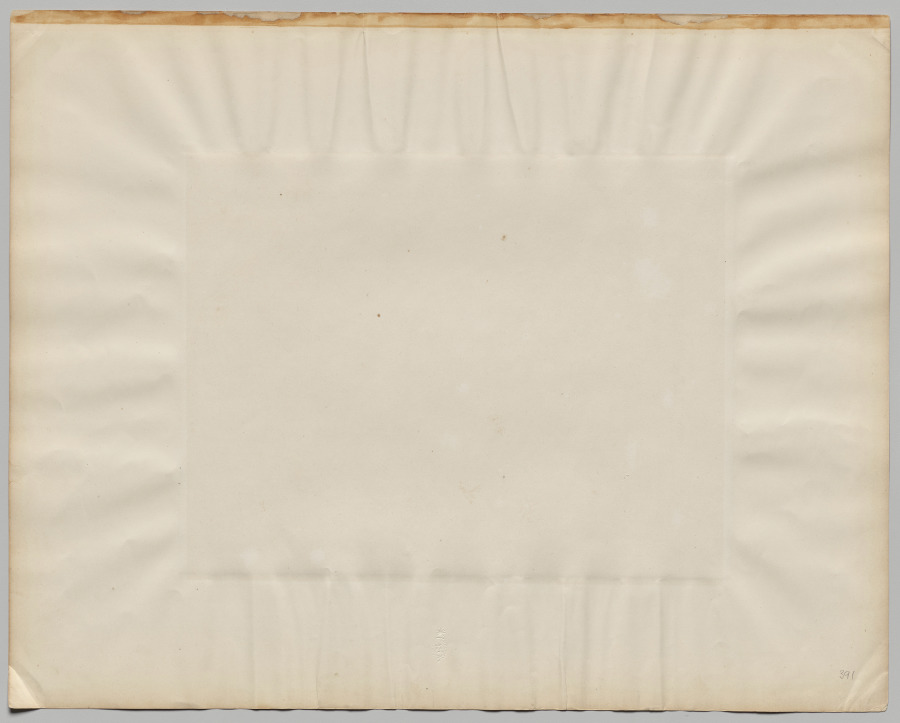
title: West and South Sides of the Vimana Walls, Great Temple (Brihadeshvara) at Tanjore (Thanjavur)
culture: England, 19th century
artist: Captain Linnaeus Tripe (British, 1822–1902)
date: 1858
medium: albumenized salt print from a waxed paper negative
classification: Photograph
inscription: Imprinted in black type on white paper adhered to recto of mount: "15"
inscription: Embossed on recto of mount: "LT/Photographer to Government"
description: The double-storied exterior base of one of the largest temples constructed and still standing on the Indian subcontinent is articulated with niches containing images of Hindu gods. Within these walls is an inner sanctum containing a monolithic linga (the phallic emblem marking the sacred presence of the god Shiva). Tripe used waxed paper instead of glass negatives, possibly because he was concerned about breakage and weight. When printing the photograph, he laid the negative on a paper treated with a light-sensitive emulsion of sodium chloride (table salt) and silver nitrate and exposed it to light, to create a “salt print.”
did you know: This is thought to have been the tallest structure in the world when it was constructed around 1000.